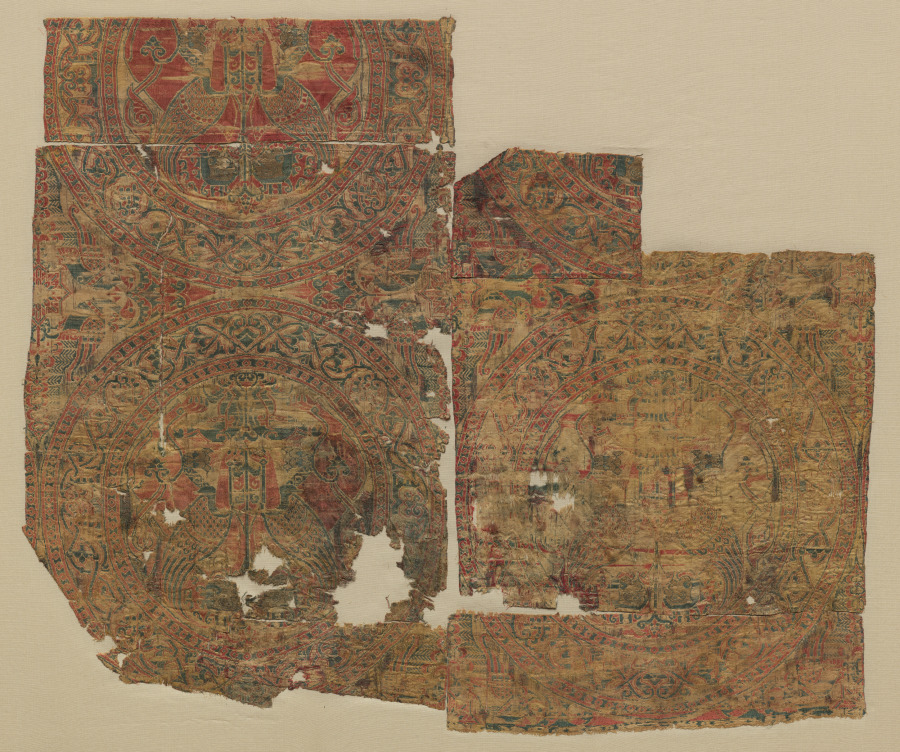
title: Fragment with confronted sphinxes in roundels from the tomb of Saint Bernard Calvo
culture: Spain, Almeria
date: 1200–43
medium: Silk and gold thread: lampas, taqueté, and plain-weave variant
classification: Textile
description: Composite creatures, such as winged lions and sphinxes, predate the rise of Islam in the Arabian Peninsula. Islamic textiles continued to include them for centuries after the Arab conquest of Spain. Pairs of lions with gold faces rear up to bite the haunches of the winged beasts. In between the roundels are pairs of peacocks, motifs traceable to pre-Islamic Persian art that spread throughout the Islamic world, including Spain. The body of Saint Bernard Calvo, the Catholic Bishop of Vich in 1233–43, was wrapped in textiles, including these fragments that still retain traces of his blood.